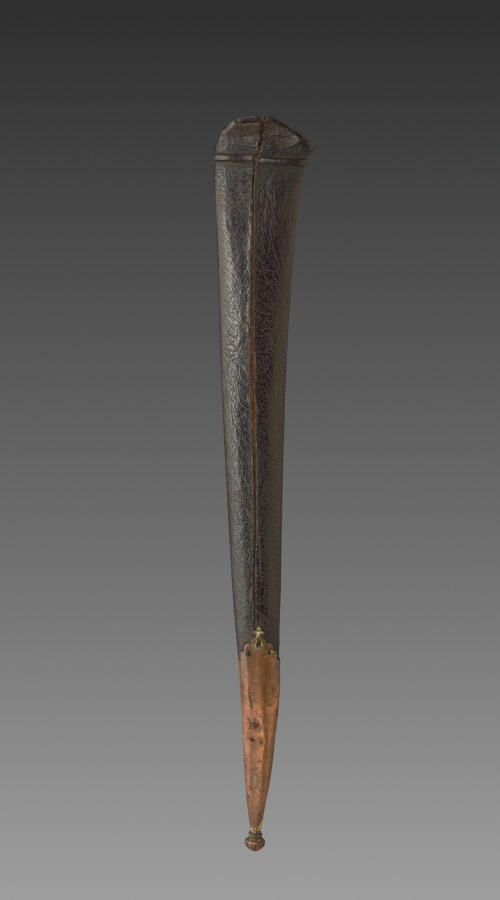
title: Dagger (brown leather case)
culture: India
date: 1700s–1800s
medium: silver inlay and leather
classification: Arms and Armor